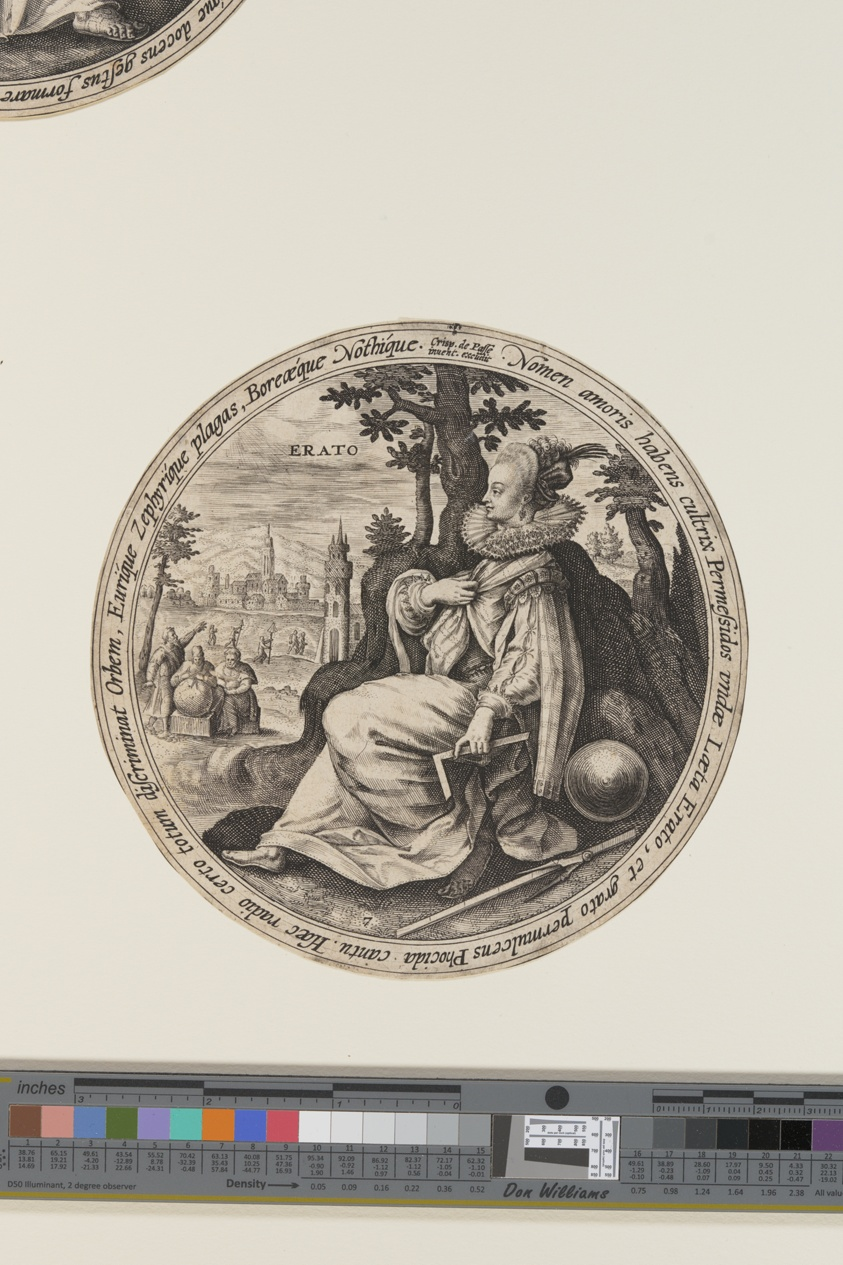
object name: Print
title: Urania, from The Muses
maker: Crispijn van de Passe I; Dutch, c. 1565–1637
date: c. 1590-1620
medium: Engraving on ivory laid paper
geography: Netherlands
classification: engraving; paper; print; prints and drawing